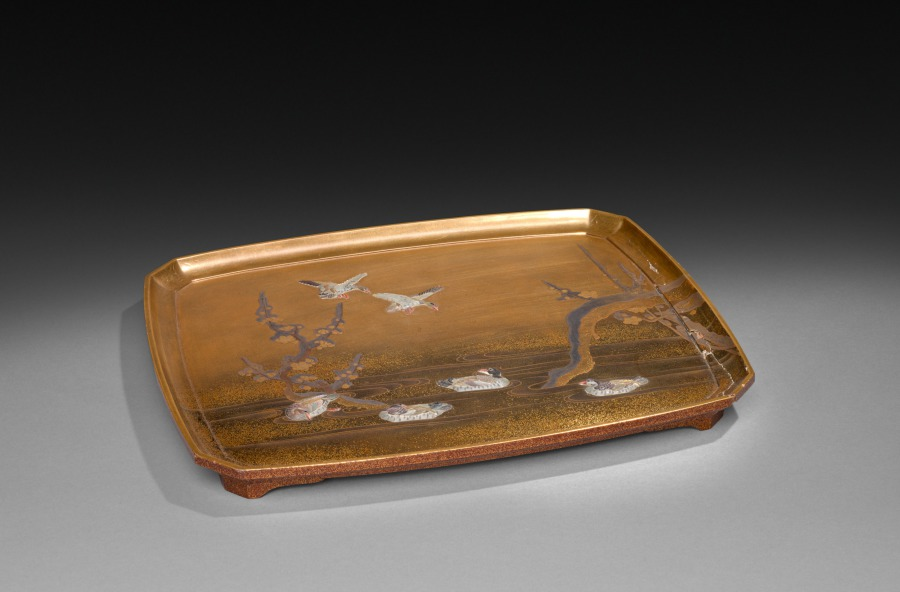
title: Box with Landscape (tray)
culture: Japan, Edo period (1615–1868) to Meiji period (1868–1912)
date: 1800s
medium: lacquer with sprinkled gold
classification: Lacquer